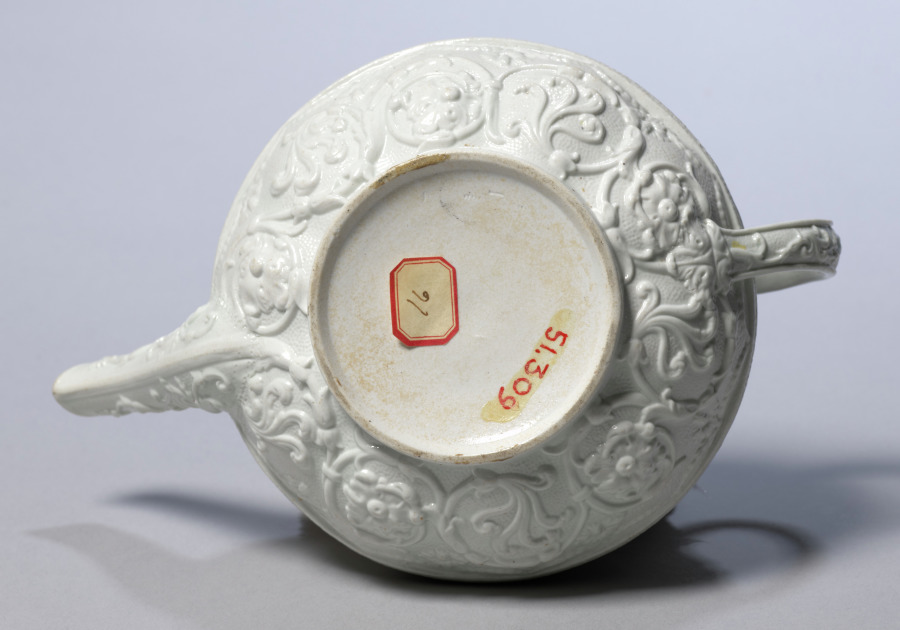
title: Teapot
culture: England, Staffordshire, 19th century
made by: Wedgwood Factory (British)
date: c. 1830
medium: stoneware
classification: Ceramic